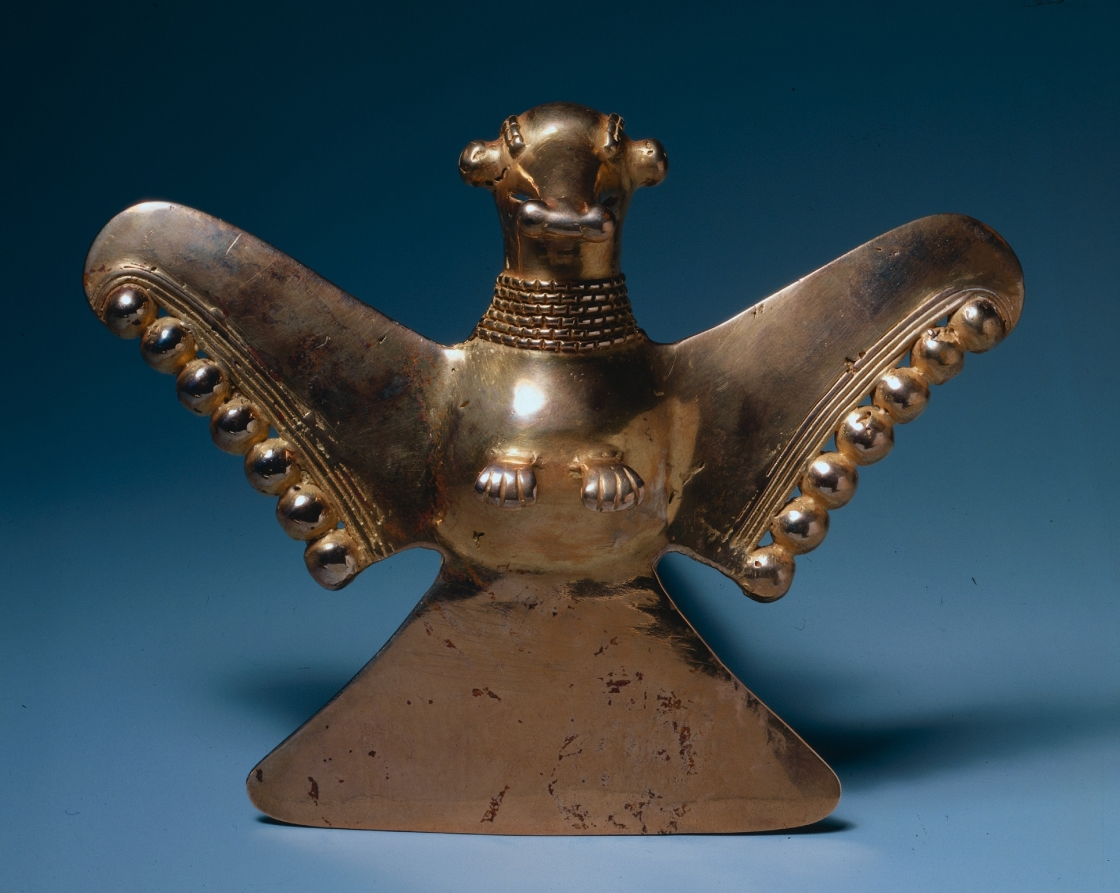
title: Bird Pendant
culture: Panama, Veraguas-Chiriquí style, 11th - 16th century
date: c. 1000–1550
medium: cast gold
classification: Metalwork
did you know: In the Panama-Costa Rica region, gold ornaments were associated with political and religious authority.